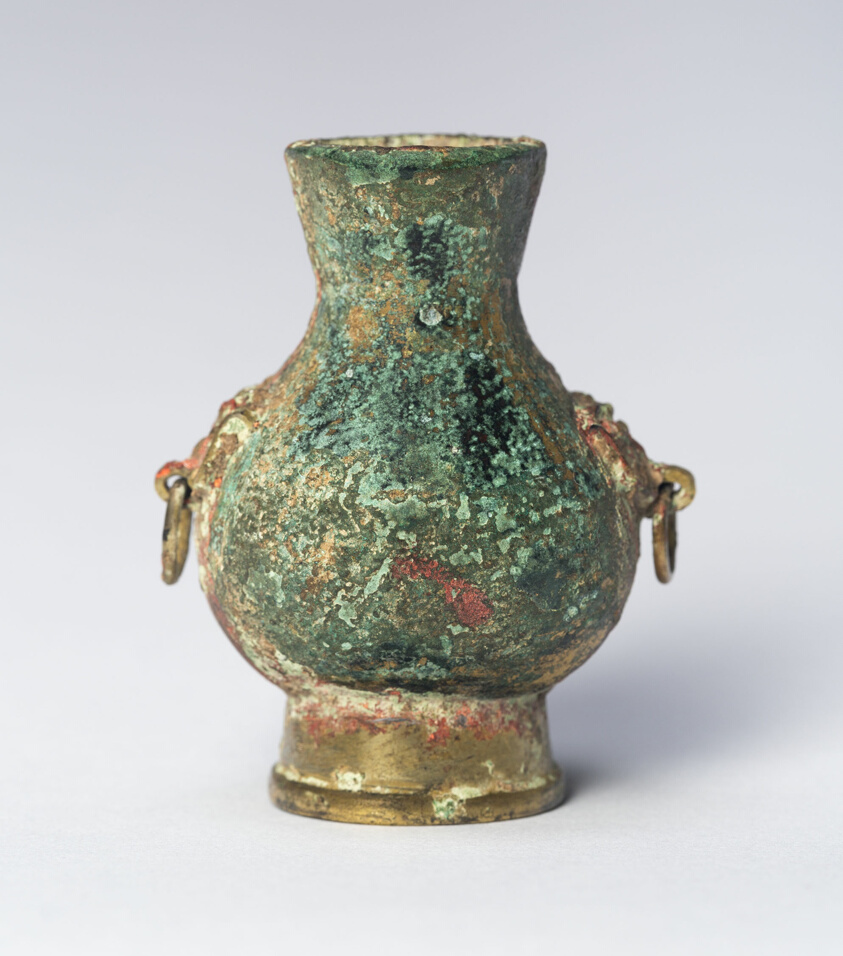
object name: Vessel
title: Miniature Wine Jar (Hu)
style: Chinese (culture or style)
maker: China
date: Tang dynasty (618–906), 8th century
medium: Gilt bronze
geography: China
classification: bronze; metal; decorative object/ornament; asian art; vessel